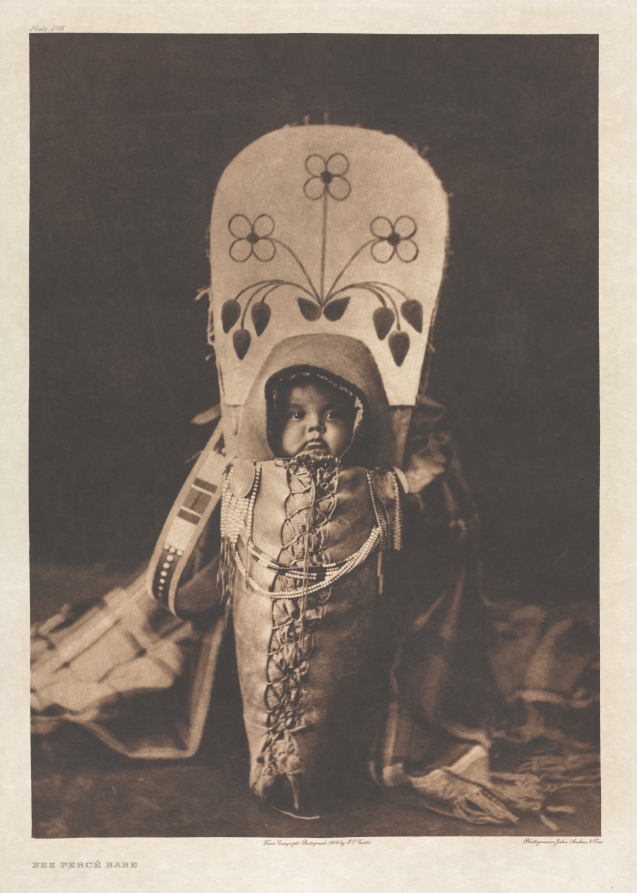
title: Portfolio VIII, Plate 266: Nez Percé Babe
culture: America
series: The North American Indian: being a series of Portfolios picturing and describing the Indians of the United States, the Dominion of Canada, and Alaska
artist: Edward S. Curtis (American, 1868–1952)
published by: The University Press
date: 1905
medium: photogravure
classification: Portfolio